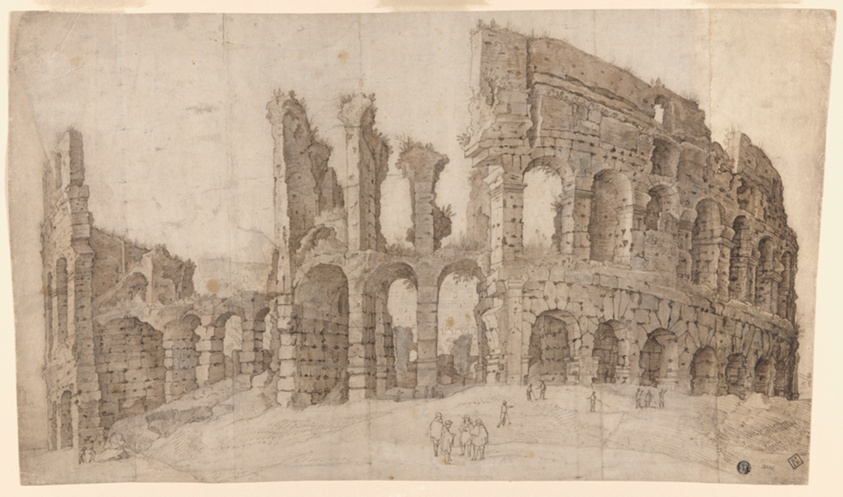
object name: Drawing and Watercolor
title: Ruins of the Colosseum in Rome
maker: Circle of Willem van Nieuwlandt, II; Flemish, c.1584-after 1635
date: c. 1600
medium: Pen and brown ink, with brush and brown and gray wash, on pieced cream laid paper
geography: Flanders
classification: ink or chalk wash; drawings (visual works); prints and drawing